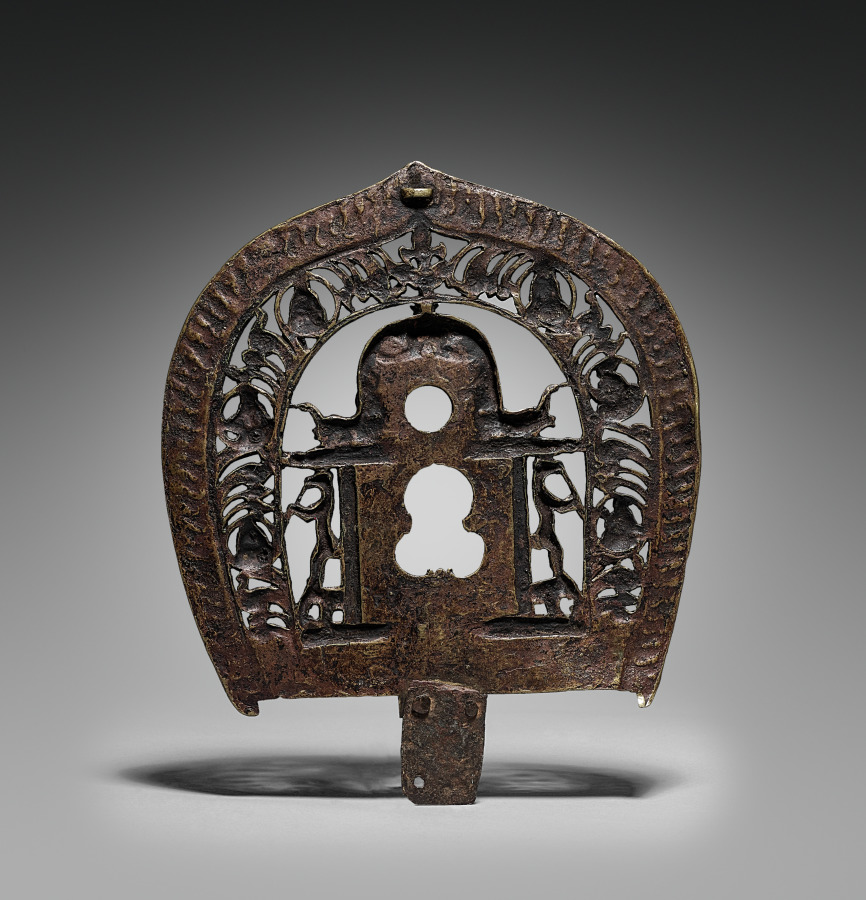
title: Halo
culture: Tibet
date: 1200s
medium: bronze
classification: Sculpture